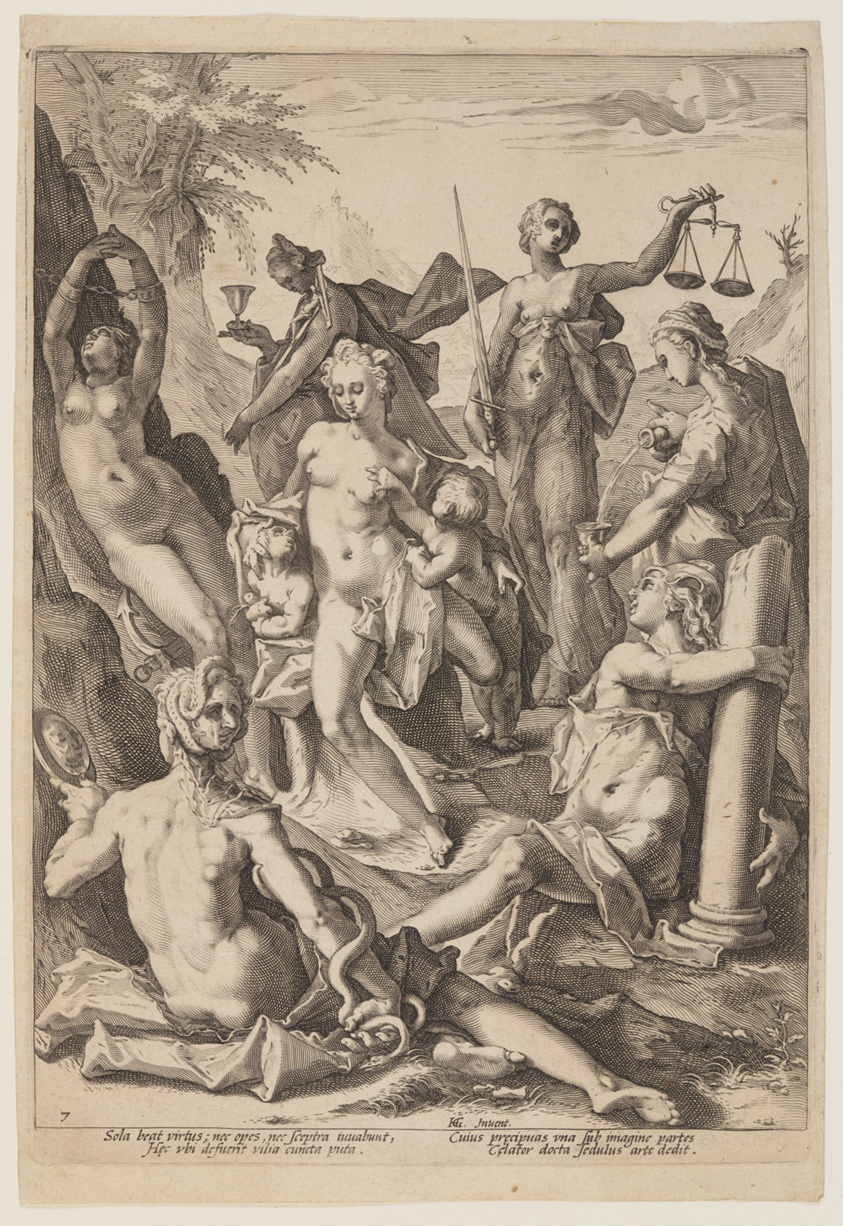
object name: Print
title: The Seven Virtues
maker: Jacob Matham (Dutch, 1571–1631); after Hendrick Goltzius (Dutch, 1558–1617)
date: c. 1600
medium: Engraving on ivory laid paper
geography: Netherlands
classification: print; paper; prints and drawing; engraving